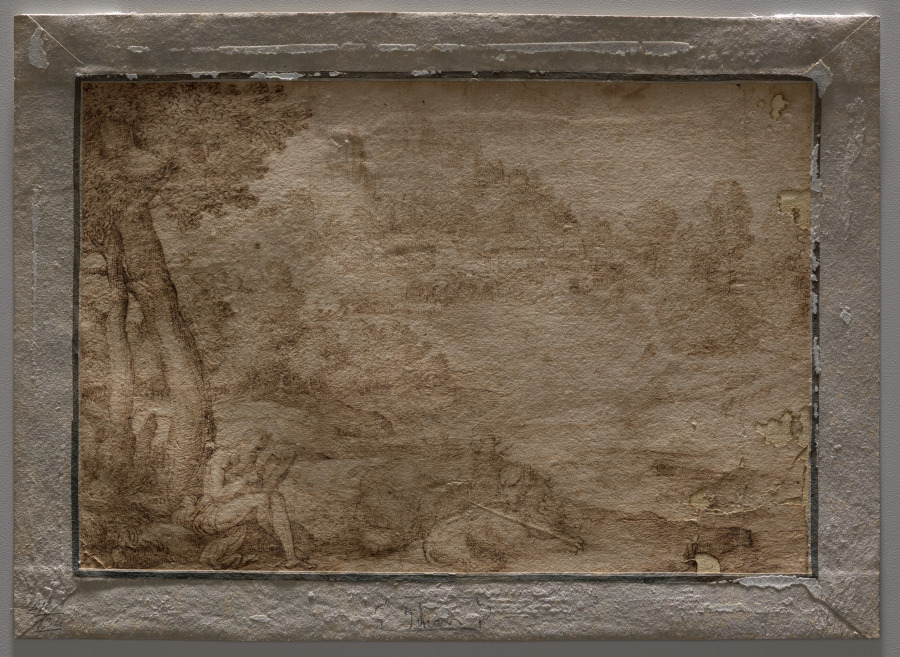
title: Saint Jerome in a Landscape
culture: Italy, 16th century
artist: Domenico Campagnola (Italian, 1500–1564)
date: c. 1530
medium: pen and brown ink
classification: Drawing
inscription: RECTO OF MOUNT, lower left, in graphite: 61 [6 crossed out, 1 underlined] / 236 [underlined] ; lower center, in graphite: Titian [inscribed in a cartouche] ; lower center, in graphite: 3 ; lower right, in graphite: 8930 [erased] ; lower right, in graphite: [illegible]/q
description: Domenico Campagnola helped to establish a specialized collector’s market for landscape drawings, building upon the legacy of his father, Giulio Campagnola, and Titian. Like Titian, Domenico’s works emphasize God’s power as expressed through the natural world. Hermit Saint Jerome, at lower left, sits in spiritual contemplation within a dynamic landscape rendered with Domenico’s distinctive linear style, complete with rustic houses, humble tree groves, and grand distant vistas. Independent drawings (drawings made as works of art in and of themselves) were a new category of drawing advanced by Domenico and others.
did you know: Domenico Campagnola was one of the first artists in Renaissance Italy to create drawings such as this as ends in themselves rather than as preparatory studies.